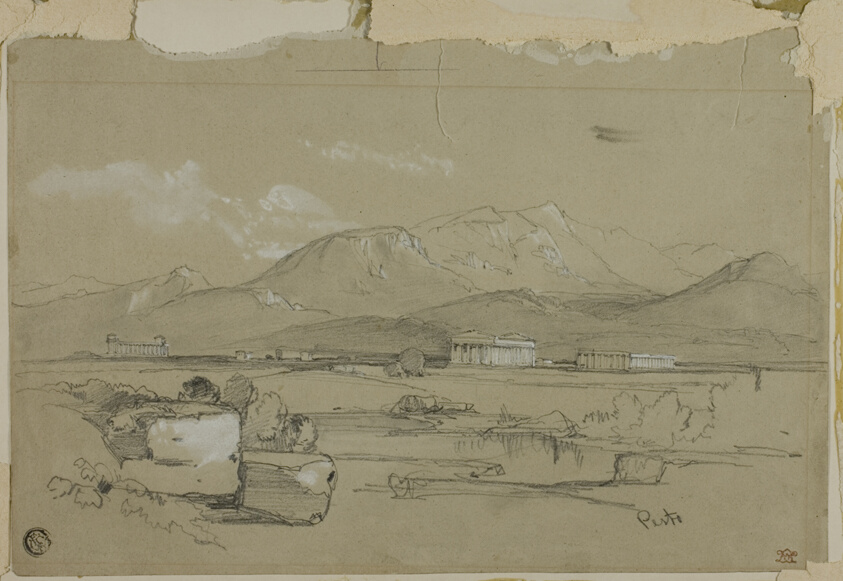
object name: Drawing and Watercolor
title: Pesto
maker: William Leighton Leitch (Scottish, 1804-1883)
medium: Graphite, with stumping, and with brush and white gouache, on grayish-tan wove paper, laid down on buff board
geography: Scotland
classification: graphite; drawings (visual works); prints and drawing